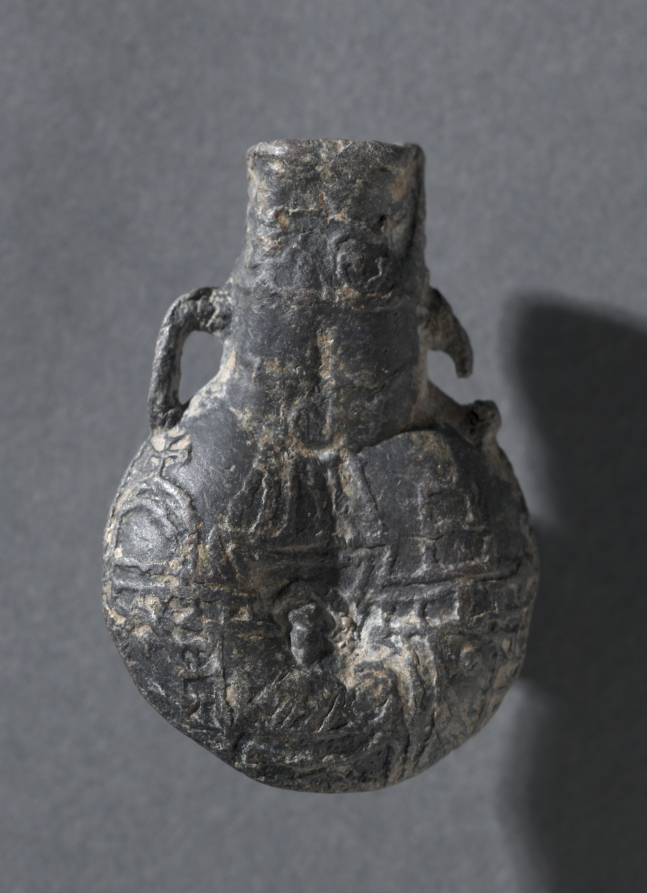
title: Pilgrim’s Flask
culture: Byzantium, Latin Kingdom of Jerusalem, Palestine, Byzantine, Crusader Period, late 11th-12th Century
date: c. 1099–1200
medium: lead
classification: Metalwork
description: After the Crusader conquest of the Holy Land in 1099, Jerusalem experienced a revival of Christian pilgrimage. During the 12th century, the Church of the Holy Sepulcher was rebuilt, redecorated, and reconsecrated. With the influx of new pilgrims, especially from Western Europe, lead ampullae (small flasks) such as this very rare example were briefly reintroduced. The flask was cast with images of the Church of the Holy Sepulcher and Christ’s Descent into Limbo (Anastasis), establishing a visual connection with the holy sites of Christ’s death and entombment.